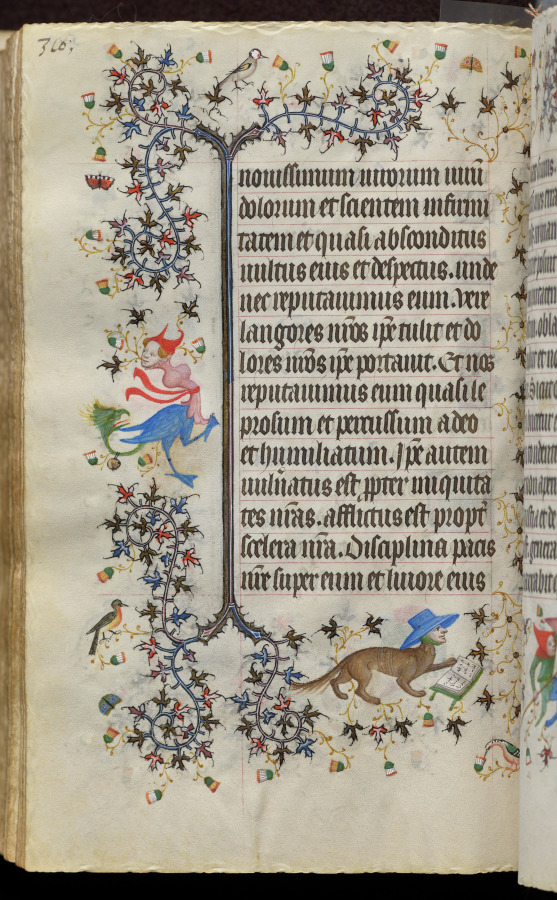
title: Hours of Charles the Noble, King of Navarre (1361-1425): fol. 155v, Text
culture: France, Paris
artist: Master of the Brussels Initials and Associates (French)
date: c. 1405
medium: ink, tempera, and gold on vellum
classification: Bound Volume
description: This precious volume was obviously highly prized by its owner, the French-born King of Navarre, who had his coat of arms painted on no less than twenty folios. Rather than directly commissioning this manuscript from a specific workshop, it seems that Charles the Noble acquired his book of hours -- perhaps ready-made for the luxury market -- while on a trip to Paris in 1404-05. A collaborative effort, six painting styles are evidenced within the pages of this codex, those of two Italians, two Frenchmen, and two Netherlanders. The painter who was responsible for the planning and decoration of the book, and who produced seventeen of the large miniatures, was a Bolognese artist known as the Master of the Brussels Initials. His principal assistant, responsible for most of the borders, was a Florentine who signed his name "Zecho" da Firenze on folio 208 verso.